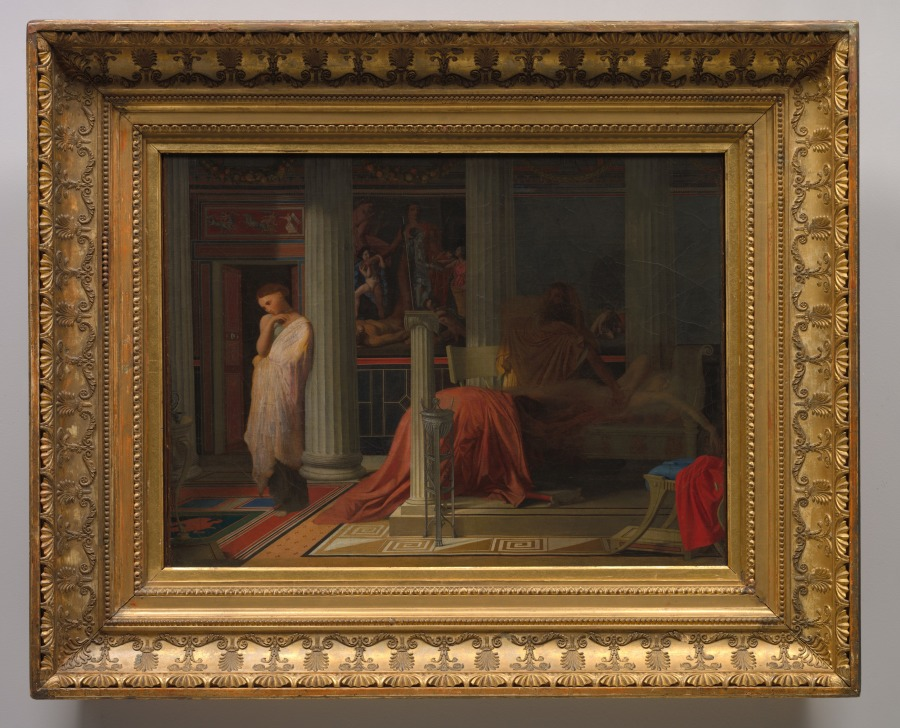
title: Antiochus and Stratonice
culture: France, 19th century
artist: Jean-Auguste-Dominique Ingres (French, 1780–1867)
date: c. 1838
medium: oil on linen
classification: Painting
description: Struck by a mysterious illness, Antiochus lies in bed near death. His grieving father, who has recently taken Stratonice as his wife, summons a doctor. Noticing that the sight of the young woman quickens Antiochus’s pulse and that passion causes his sickness, the doctor describes the youth’s predicament to his father, who selflessly offers Stratonice to his son. The subject, both a love story and an example of parental devotion, enjoyed considerable popularity well into the 1800s.